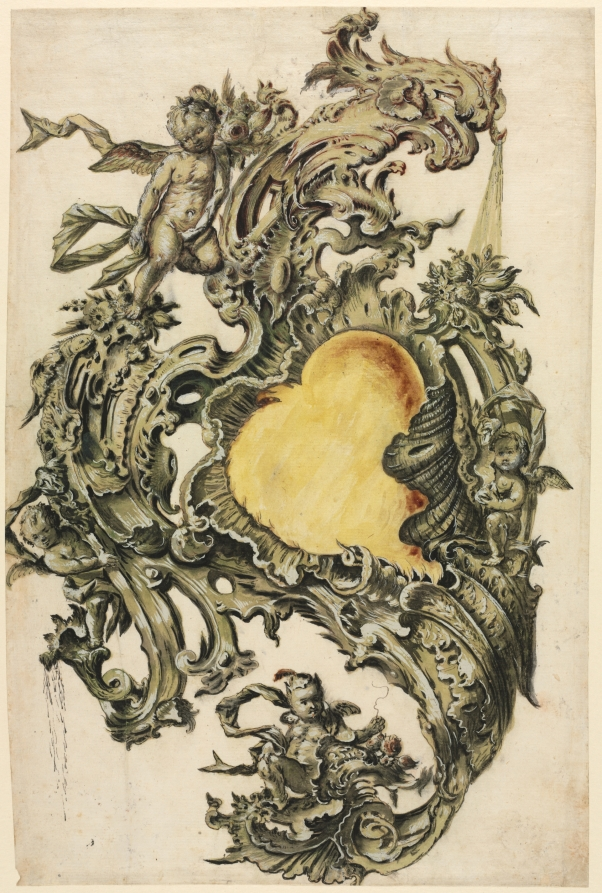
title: Cartouche with Putti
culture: Germany, 18th century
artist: Franz Xaver Habermann (German)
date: second half 1700s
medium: pen and black ink and brush and gray, black, green, yellow, and red wash, heightened with white gouache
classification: Drawing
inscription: Watermark: Heawood 3059